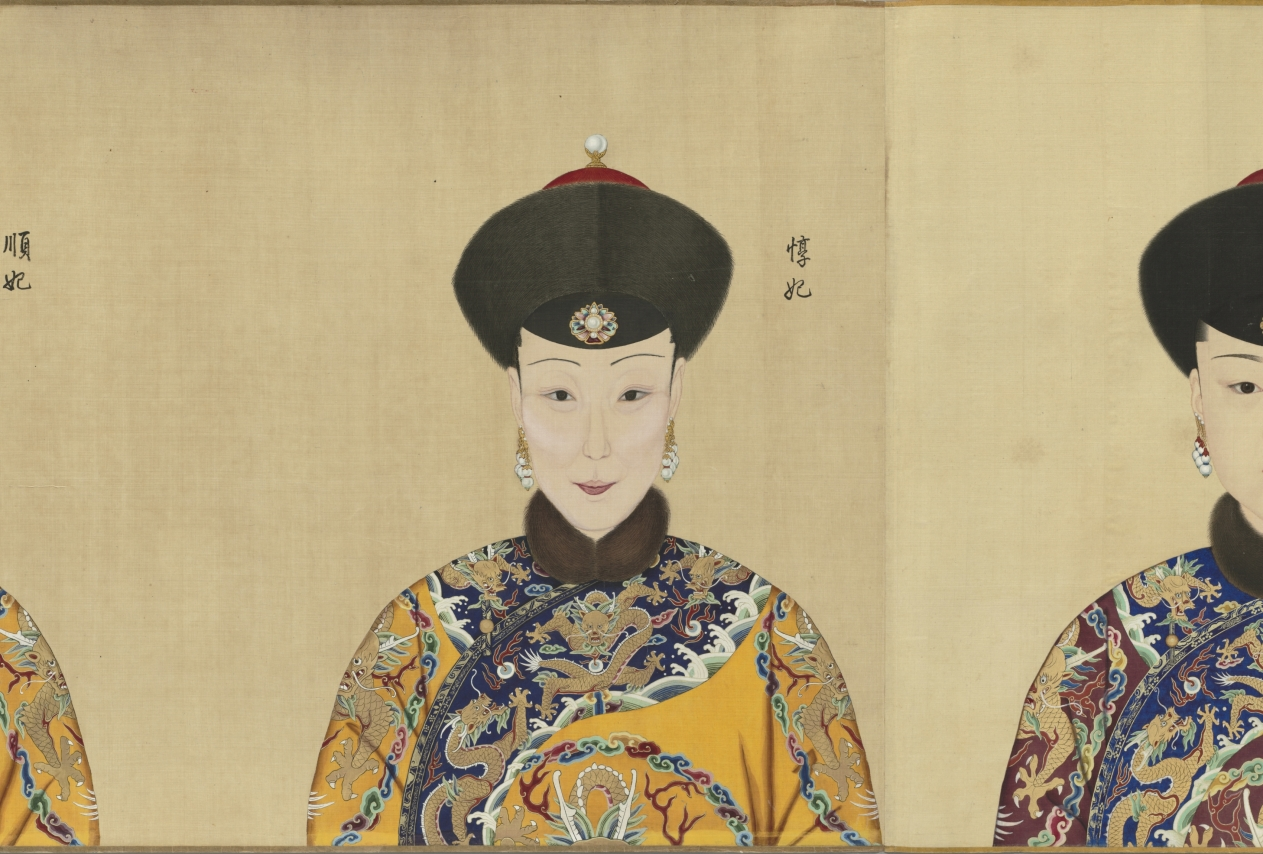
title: Portraits of the Qianlong Emperor and His Twelve Consorts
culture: China, Qing dynasty (1644–1911), Qianlong reign (1736–95)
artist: Giuseppe Castiglione (Italian, 1688–1766)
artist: and others (Chinese)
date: 1736–70s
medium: Handscroll; ink and color on silk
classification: Painting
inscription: 9 seals of the Qianlong emperor (r. 1736–95).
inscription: The eighth month, first year of Qianlong [1736] 乾隆元年八月吉日. The Empress (Xiaoxian) 皇后 (1712–1748), The Guifei (Huixian) 貴妃 (?-–1745), Chunfei 純妃 (1713–1760), Jiafei 嘉妃 (?–1755), Lingfei 令妃 (1727–1775), Shufei 舒妃 (1728–1777), Qingbin 慶嬪 (1724–1774), Yingbin 穎嬪 (1731–1800), Xinbin 忻嬪 (?–1764), Dunfei 惇妃 (1746–1806), Xunfei 順妃 (1749–1788), Shunbin 循嬪 (?–1797).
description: This portrait shows the Qianlong emperor at 26, in the first year of his reign. His likeness is followed by portraits of the empress and eleven consorts. Their portraits document the appearances of the court women around the time when they received their respective imperial titles, which occurred at different stages of the emperor's life. The first three portraits were done by the Jesuit (Roman Catholic) missionary artist Giuseppe Castiglione, whereas the later ones were by Chinese court painters. Formal portraiture contributed to the affirmation of status and construction of role and identity. This scroll served as both familial documentation and a "mind picture" of the Qianlong emperor, suggesting that his constructed image of emperorship was inseparable from concepts of self and family. It was stored in a carved red lacquer box bearing the original painting title Mind Picture of a Well-Governed and Tranquil Reign (see CMA 1969.32).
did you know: Lingfei 令妃 (1727–1775), the first consort depicted in the maroon or “incense-colored" 香色 robe, was the mother of six of Qianlong’s children, including the future Emperor Jiaqing.